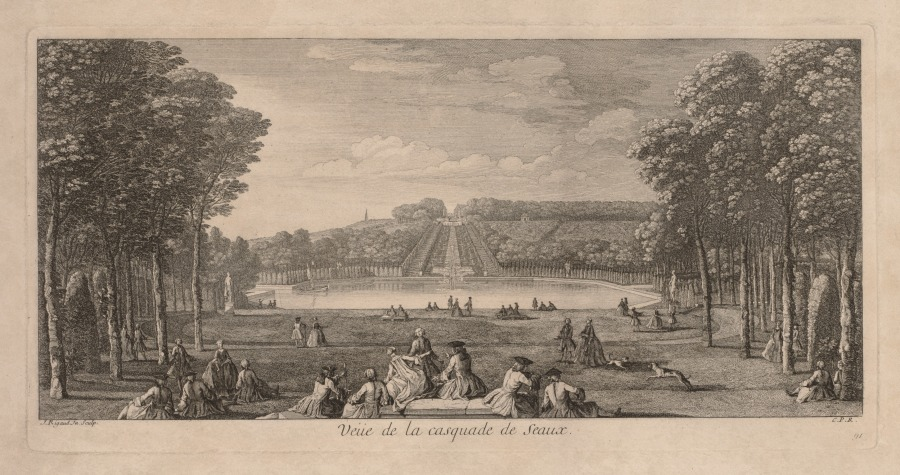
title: View of the Cascade de Seaux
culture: France, 18th century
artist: Jacques Rigaud (French, 1681–1754)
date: c. 1720–50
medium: engraving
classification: Print